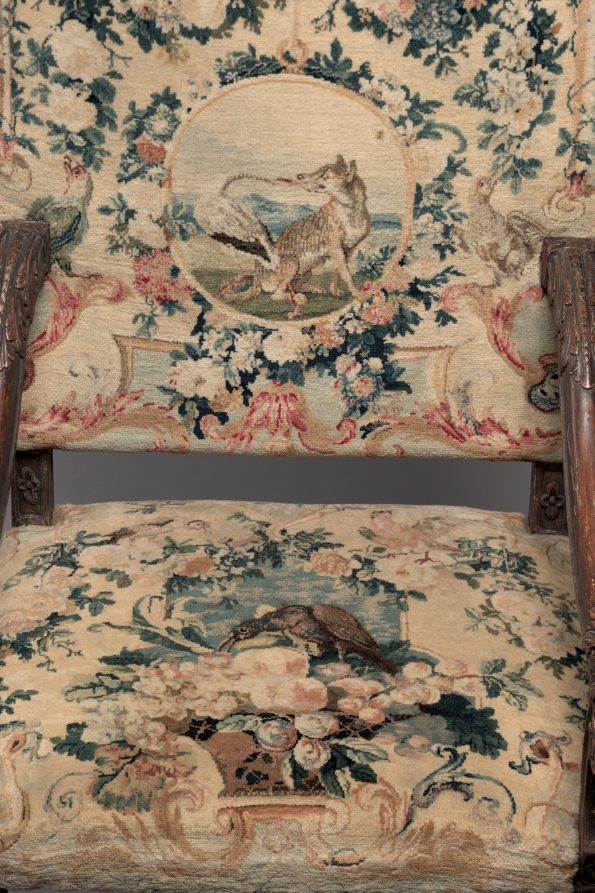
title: Armchair (1 of 4)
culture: France, 18th century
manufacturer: Royal Savonnerie Manufactory, Chaillot Workshops (French, est. 1627)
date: before 1717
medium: carved wood, Savonnerie knotted-pile (symmetrical rug knot) upholstery; wool, hemp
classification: Furniture and woodwork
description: These chairs belong to a suite that includes a settee (also in the CMA’s collection) and a tapestry made for a count and countess to mark their wedding in 1717. Furniture of this scale was usually placed against the wall in grand reception halls, more as a display of wealth than for use. Upholstered in Savonnerie tapestries, this suite was among the most treasured and expensive example anyone could own and typically reserved for royalty. To add decorative and intellectual interest to the textiles, weavers incorporated symbols depicting various stories from the Fables of Jean de La Fontaine, published from 1668 to 1694 and largely adapted from Aesop and other early storytellers.